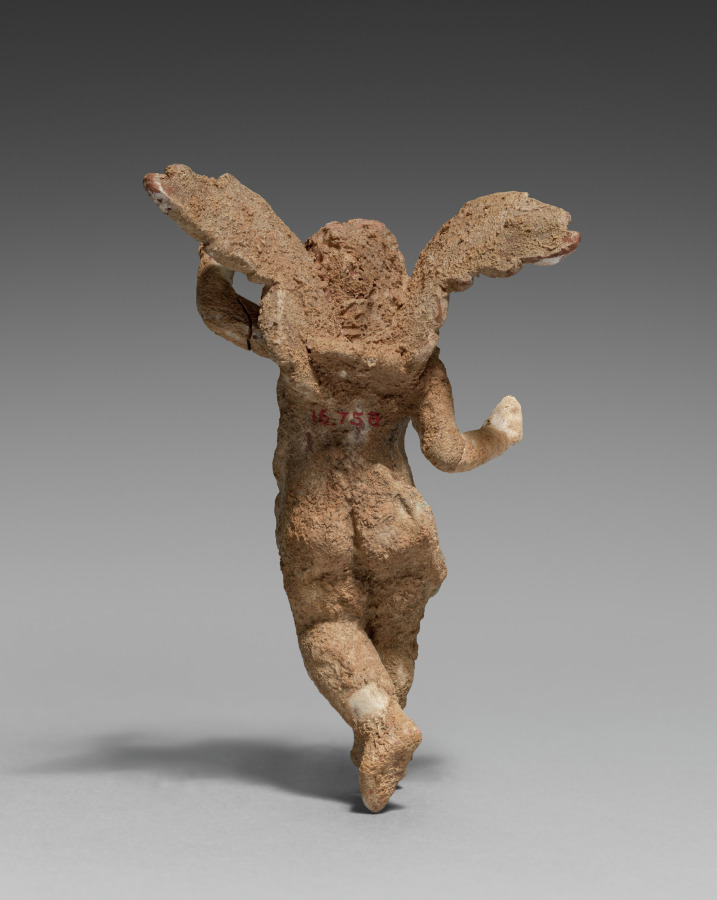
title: Figurine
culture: Greece, Myrina, Hellenistic period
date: late 400s–300s BCE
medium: terracotta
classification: Sculpture